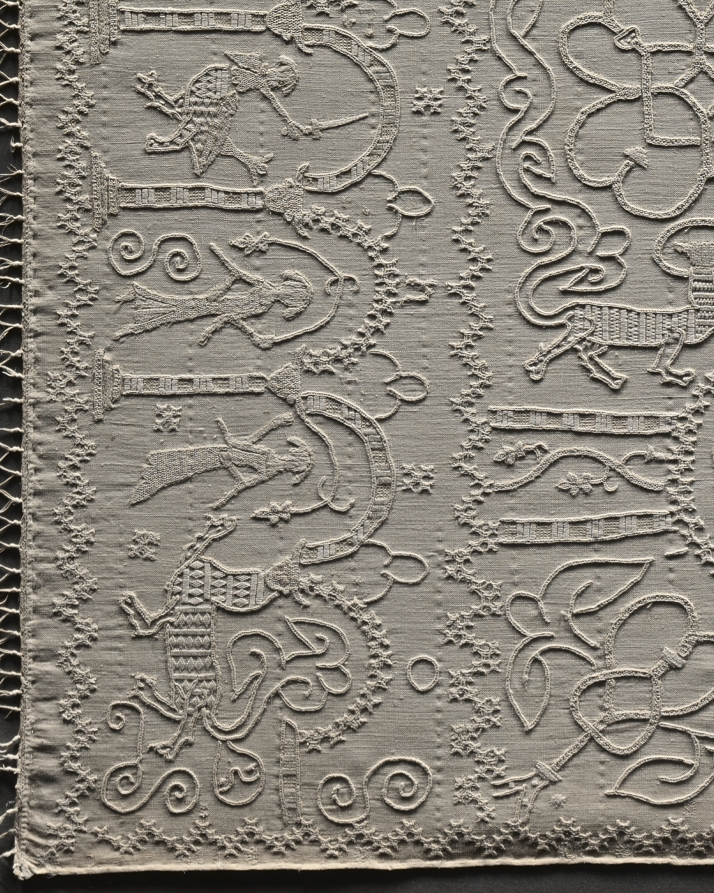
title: Altar Cloth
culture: Germany, Altenberg on the Lahn, Premonstratensian Convent, 14th century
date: c. 1350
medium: embroidery: linen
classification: Embroidery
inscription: various motifs enclosed in quatrefoils with identifying inscriptions in Gothic letters.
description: This large, embroidered altar cloth is one of the rarest, most important medieval church furnishings in existence. It was stitched by nuns in the Premonstratensian Convent in Altenberg on the Lahn River, north of Frankfurt, Germany, and was used to cover the church’s high altar in the weeks leading up to Easter. The cloth is an example of linen embroidery, a specialty of German nuns in the later Middle Ages. The Altenberg monastery church once had valuable furnishings; the high altar retable (a decorated frame with sculptures and paintings on the top of an altar) has survived, the main parts of which are now in the Städel Museum in Frankfurt, Germany.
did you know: When lit from behind, the previously hidden details emerge and the complex design becomes evident.